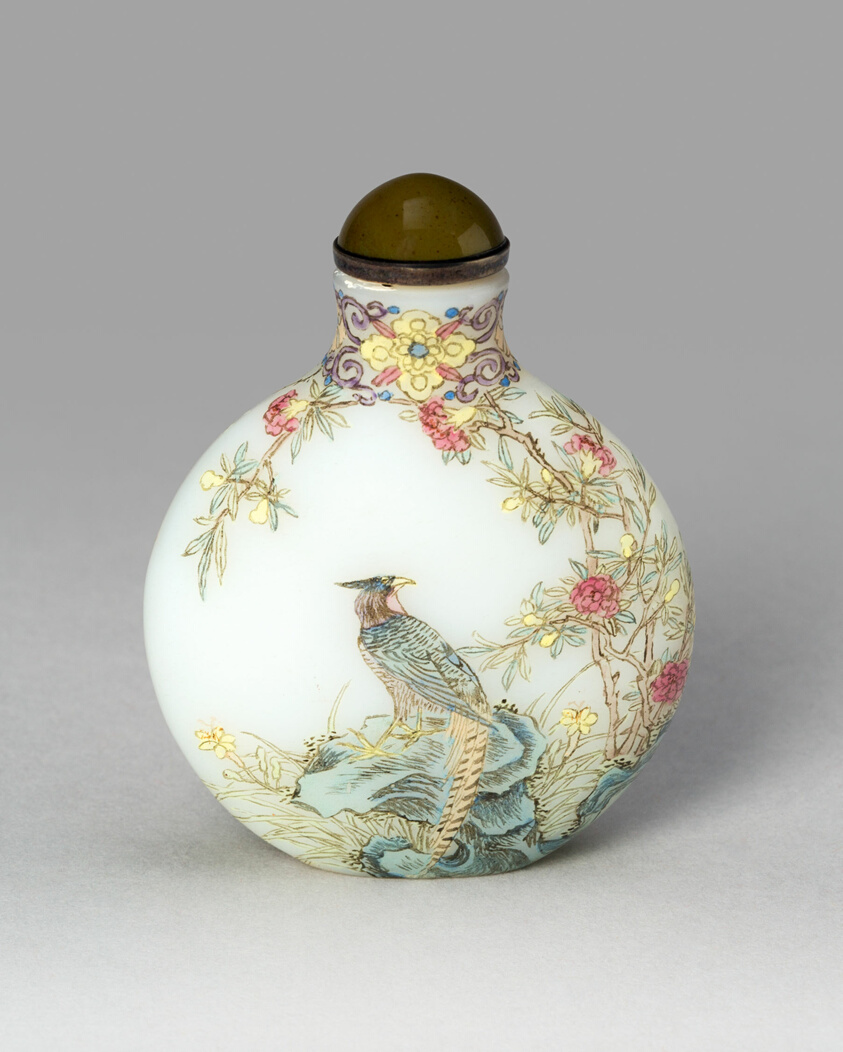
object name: Vessel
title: Snuff Bottle with Golden Pheasant, Swallows, Tree Peony, Apricot Blossoms, and Willow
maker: China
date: Qing dynasty (1644–1911), Qianlong reign mark and period (1735–1796)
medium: Enameled glass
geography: China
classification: glass; snuff bottle; asian art; vessel